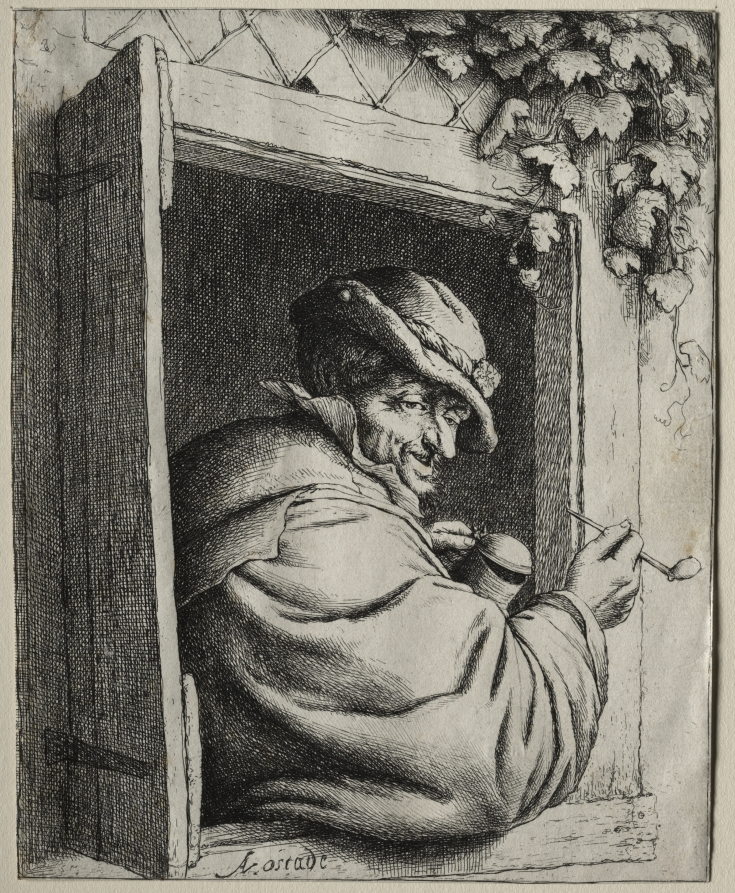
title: The Smoker at the Window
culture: Netherlands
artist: Adriaen van Ostade (Dutch, 1610–1684)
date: c. 1648–50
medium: etching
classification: Print